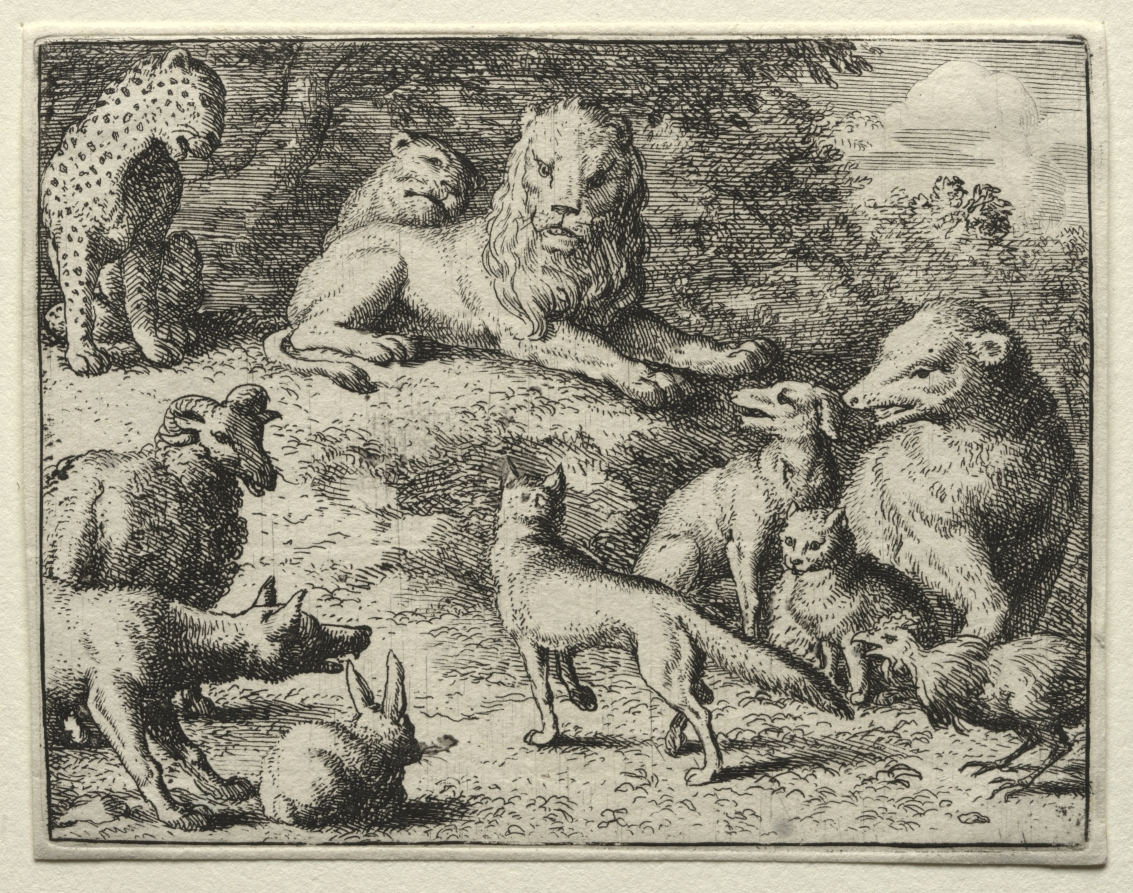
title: Reynard the Fox: Reynard Appears at Court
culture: Netherlands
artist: Allart van Everdingen (Dutch, 1621–1675)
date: 1650–75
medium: etching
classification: Print